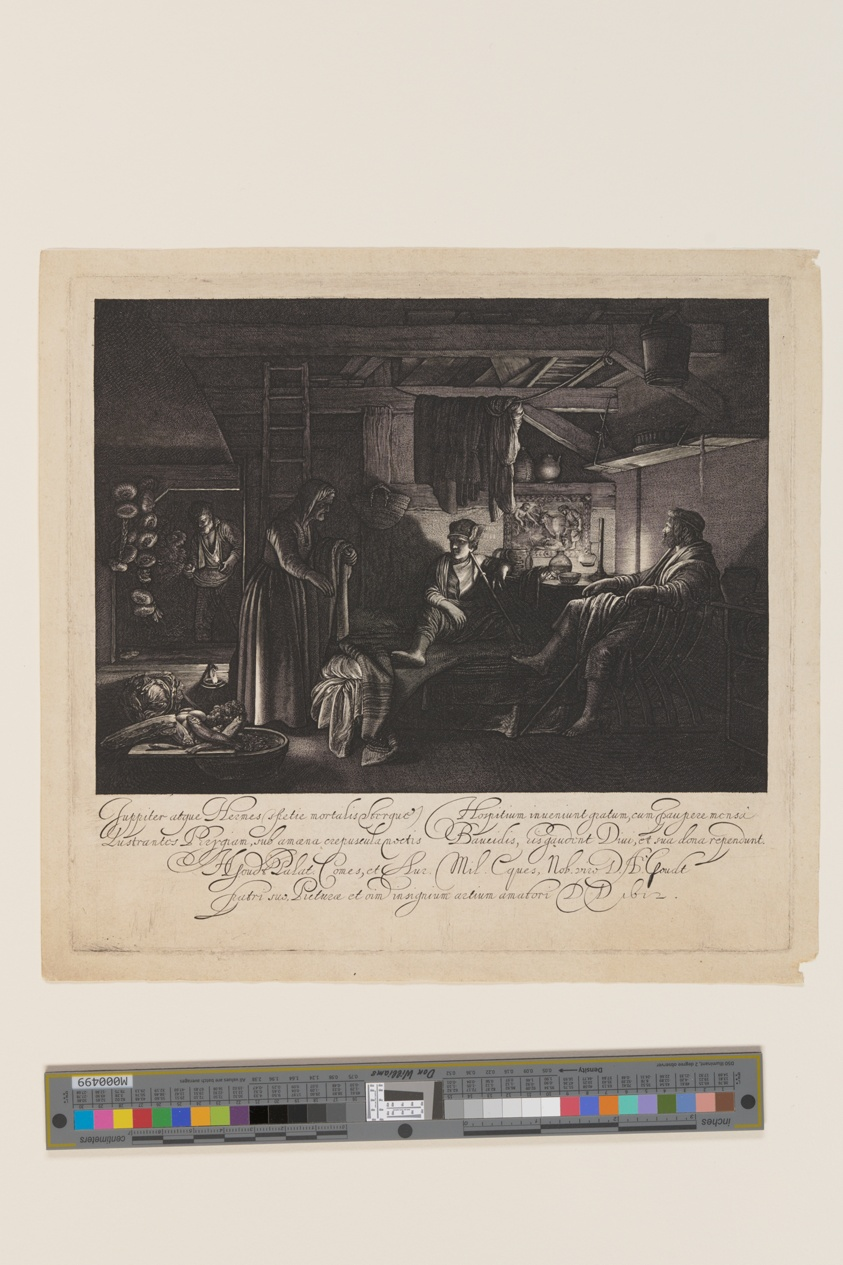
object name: Print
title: Jupiter and Mercury in the House of Philemon and Baucis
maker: Hendrick Goudt (Dutch, 1583–1648); after Adam Elsheimer (German, 1578-1610)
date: 1612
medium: Engraving on ivory laid paper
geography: Netherlands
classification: print; paper; prints and drawing; engraving